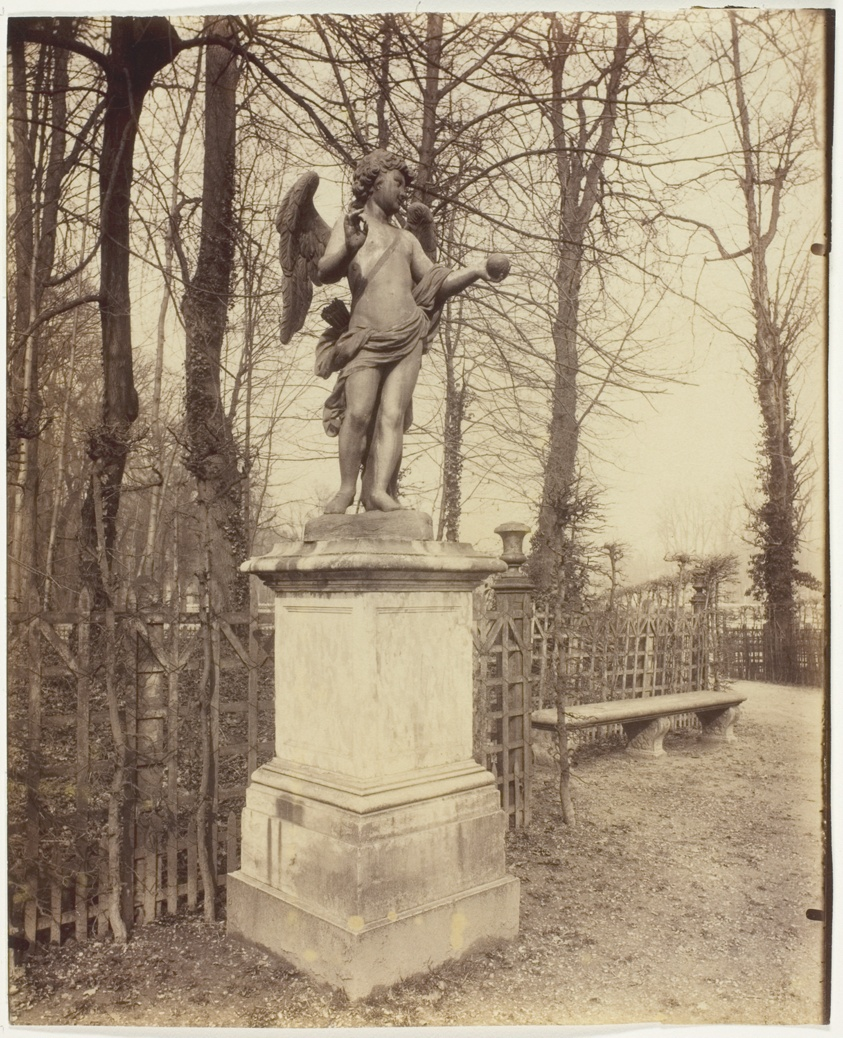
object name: Photograph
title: Versailles, Bosquet de l' Arc de Triomphe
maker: Jean-Eugène-Auguste Atget (French, 1857–1927)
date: 1904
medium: Albumen print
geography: France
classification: albumen silver print; photographic process; photography; photograph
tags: Collected by Hugh Edwards